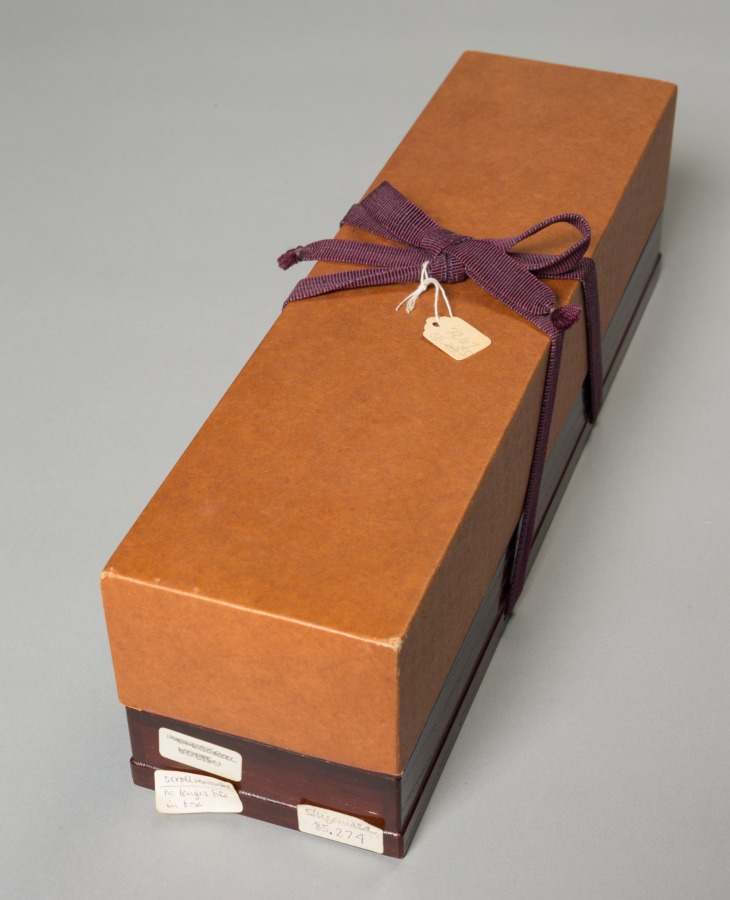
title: Two Beauties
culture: Japan, Edo period (1615–1868)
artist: Kitao Shigemasa (Japanese, 1739–1819)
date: late 1700s–early 1800s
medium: hanging scroll, pillar painting: ink and color on silk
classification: Painting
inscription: Artist's signature and seal, lower right corner. Poem inscribed on upper section of scroll.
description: Shigemasa favored using colors in broad opaque masses, as seen here in the beauties’ robes. He was a painter, printmaker, and poet, specializing in courtesan and actor prints. The format of this hanging scroll or "pillar painting" allows for the work to be hung on a pillar in a Japanese home.